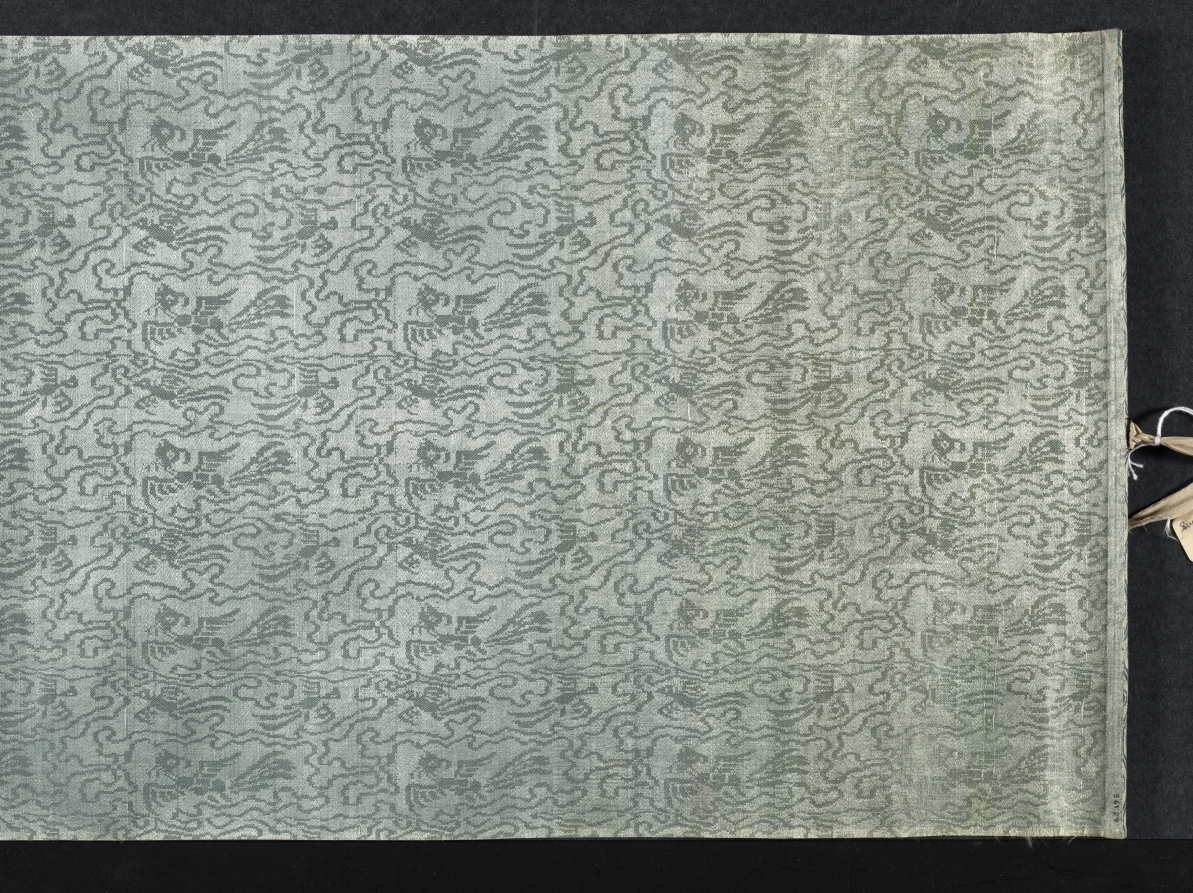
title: Mt. Taibo in the Style of Wang Meng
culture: China, Ming dynasty (1368–1644)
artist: Du Qiong (Chinese, 1396–1474)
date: 1442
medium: handscroll; ink and light color on paper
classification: Painting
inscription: Artist's inscription, signature, and 11 seals: [1 seal] Tung-yüan chai. Huang-ho-shan-ch'iao [Wang Meng] painted a painted called T'ai-po Mountain. Its brushwork is superior and admirable, which is very close to Yu-ch'en [Wang Wei, 699-759]. The cleverness of its composition, the maple groves and rustic temples, the inaccessible ravines and autumnal plateaus, the periolous peaks and strange rocks, etc., all seem to be so natural. The paper is only a little over eight feet, but the landscape has the range of a thousand miles. Once you open and note the contents, it is as if one were roaming among the mountain peaks enveloped in mist and clouds, and forgot the dusty world. When I first saw this, I was so mixed with excitement and joy that I could not take my hands off the painting. So I put it on the table, and tried my best to imitate it, forgetting sleeping and eating for about three months before it was completed. Although I do not dare to tread in the footsteps of Huang-ho shan ch'iao, I took great pains to capture his spirit in composition and colors. I do not know whether it would pass the judgment of the experts. On the fifteenth day of the fifth month, the seventh year of the Cheng-t'ung year [1442], inscribed by Tung-yüan, Tu Chiung. [2 seals] Yung-chia; Ching-chieh ming-men. [8 seals on painting] Tung-yüan chai; Ching-chieh ming-men; Yung-chia; Tu Ch'iung yin; Tung-yüan (repeated 5 times). trans. WKH/LYSL 3 colophons and 7 additional seals: 1 colophon and 2 seals of Chou Ting (1401-1487); 1 colophon and 2 seals of Wu K'uan (1435-1504); 1 colophon, dated 1655, and 2 seals of Lan Ying (1585-after 1664).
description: When a Chinese painter "imitated" a painting by a past master, the intention was never to produce an exact copy. Du Qiong, the Ming painter from Suzhou, is a case in point. The painting style of this handscroll is actually closer to that of Huang Gongwang (1269–1354) than to the style of Wang Meng (about 1301–1385). Both masters were active during the previous dynasty and are among the so-called Four Great Masters of the Yuan dynasty (1279–1368). In this painting, the interplay of styles, including Du Qiong's own, contribute to an inner dimension that is more than visual. Mt. Taibo is located in the province of Zhejiang and is known for its scenic beauty. In this scroll, however, it is not depicted literally. The image is an ideal representation of mountains in southeastern China.